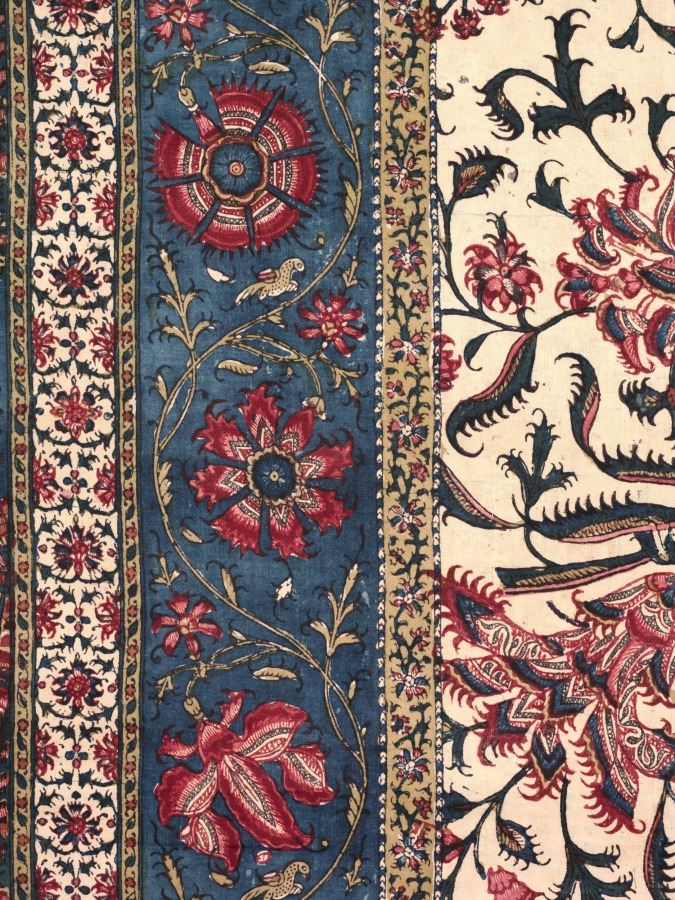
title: Chintz door curtain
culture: Iran, Isfahan, Qajar period (1779–1925)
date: 1800s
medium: Cotton: plain weave; chintz; hand drawing and block printing: bleach, mordant, and dye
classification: Textile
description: Lightweight white cotton cloth was transformed into this beautiful chintz, admired for its vibrant and durable colors, stunning pattern, fine quality, and rarity. Peacocks and a variety of birds appear amid vines with fanciful blossoms in the niche field and main border. Striking end borders feature blossoms in leaf-outlined diamonds on alternating ground colors of white, mustard, red, and blue. The complex chintz technique involving hand drawing, block printing, bleach, mordant, and dyes was developed in India. By the 1600s and 1700s, chintz was designed to target European and Asian markets and often featured large tree-of-life patterns. Chintz was also made in Iran by the 1400s, but this rare door curtain from the 1800s is among the oldest known examples.